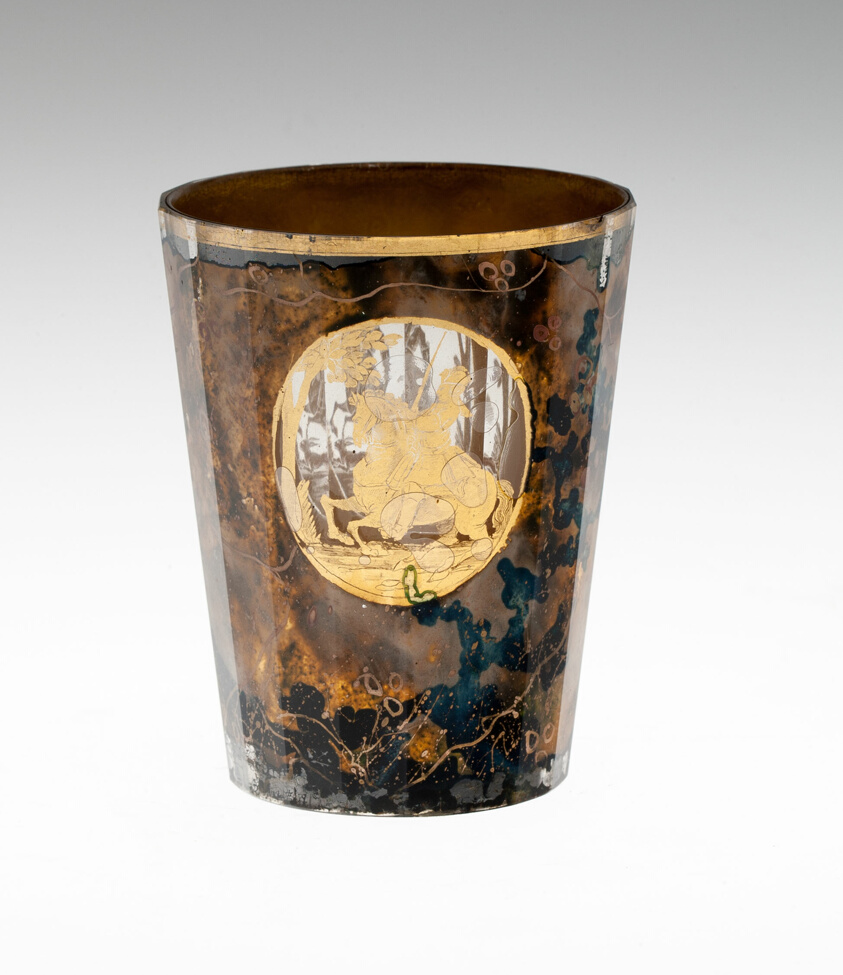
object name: Glass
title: Beaker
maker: Bohemia, Czech Republic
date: c. 1730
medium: Glass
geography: Bohemia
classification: drinking vessel; glass; european decorative arts